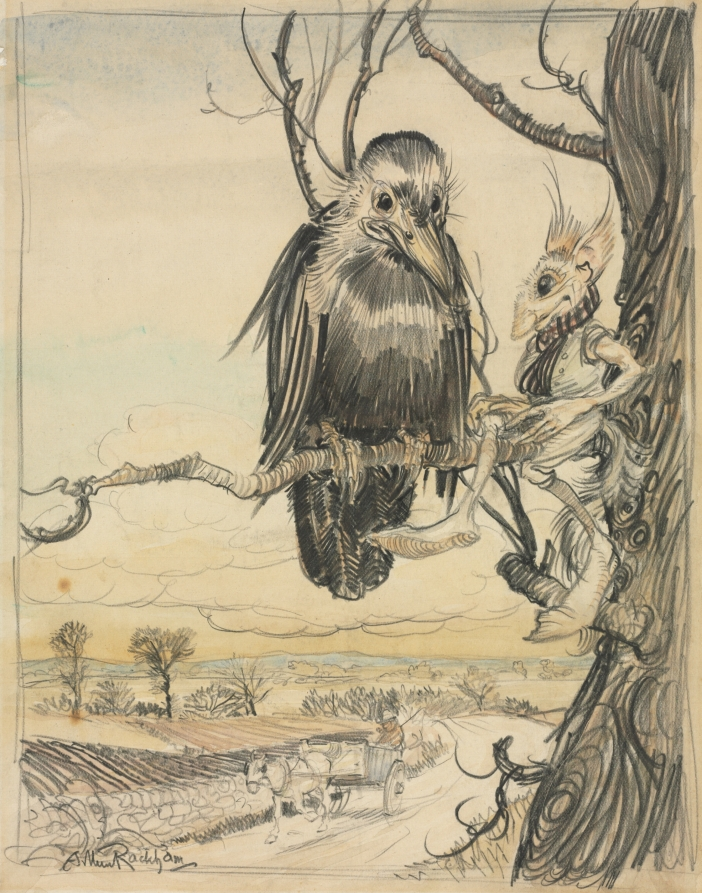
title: A Squirrel and a Crow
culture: England, 20th century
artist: Arthur Rackham (British, 1867–1939)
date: 1913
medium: ink and graphite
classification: Drawing